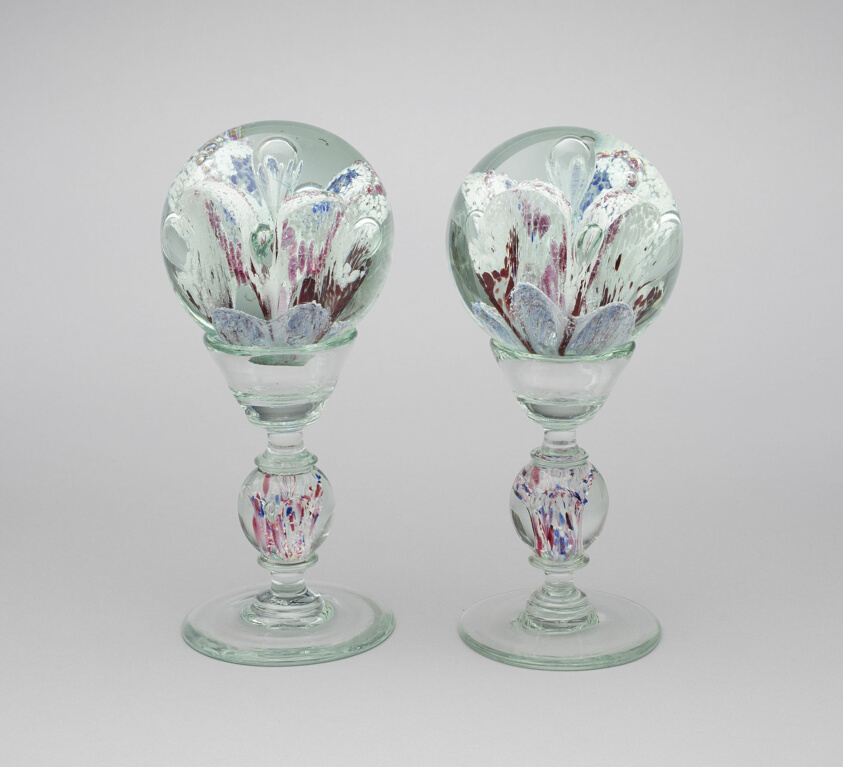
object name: Glass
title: Pair of Mantel Ornaments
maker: Artist unknown (American, 19th century)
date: 1870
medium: Glass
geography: United States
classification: glass; household accessory; american decorative arts; american arts; paperweight; decorative arts